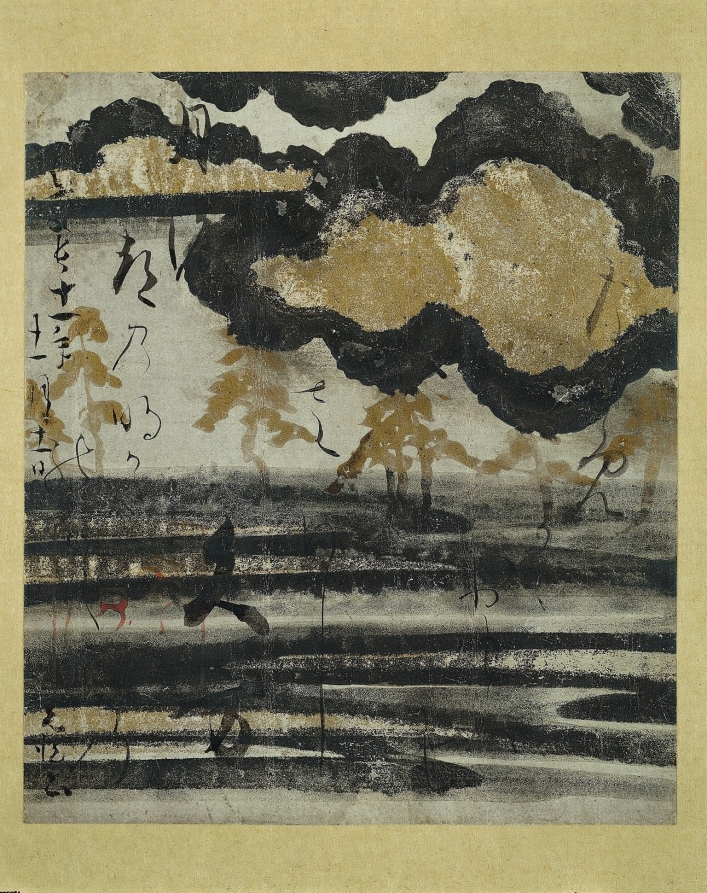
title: Poem-card from the Shinkokin wakashu (New Collection of Japanese Poems from Ancient and Modern Times) with Design of Pine on a Beach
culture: Japan, Momoyama (1573-1615) - Edo (1615-1868) periods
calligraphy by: Hon'ami Kōetsu (Japanese, 1558–1637)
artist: Tawaraya Sōtatsu (Japanese, c. 1570–c. 1640)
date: 1606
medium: card mounted on a hanging scroll; gold, silver, and ink on paper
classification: Painting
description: Tawaraya Sotatsu and Hon’ami Koetsu are both associated with the founding of the Rimpa school of Japanese painting. In this poem-card––one of 16 that survive––Tawaraya painted the gold and silver design, over which Hon’ami recorded poems from Shinkokin wakashu. The verses read from top to bottom and from right to left: "Even as I gaze, the thought of it is lonely. High in the heavens the moon-capital lies still in the sky of its dawning."